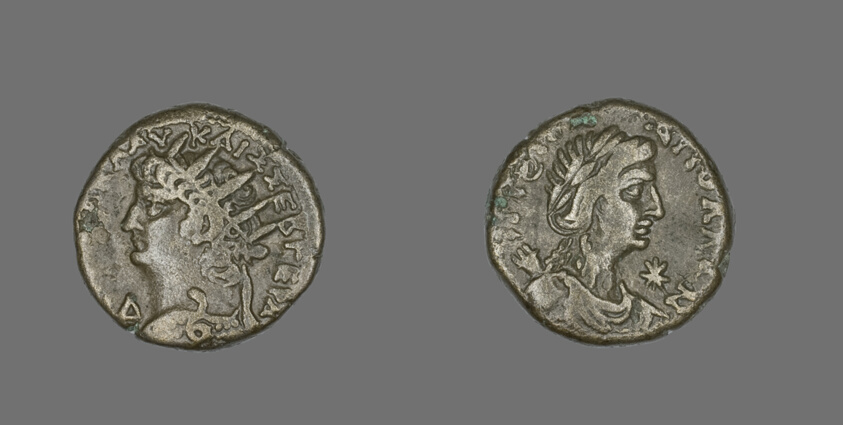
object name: Coin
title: Tetradrachm (Coin) Portraying Emperor Nero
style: roman period (egyptian), greco-roman (egyptian)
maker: Roman, minted in Alexandria, Egypt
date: 67-68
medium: Billon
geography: Egypt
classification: coin; ancient art